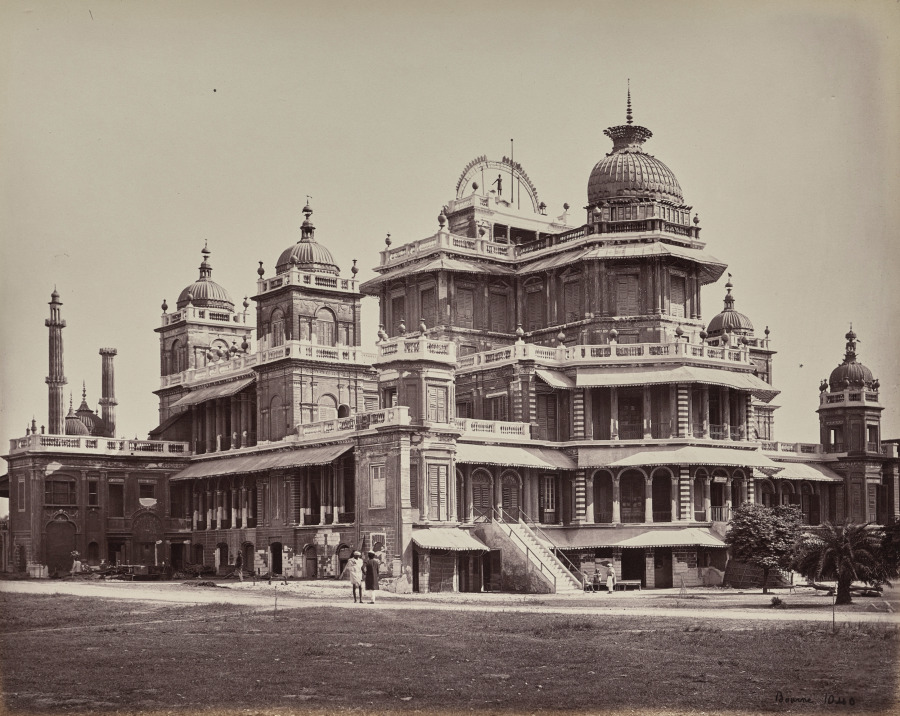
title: Lucknow. The Kaiser Pass and Southeast View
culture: England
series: Photographs of Northern India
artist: Samuel Bourne (British, 1834–1912)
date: 1863–70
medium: albumen print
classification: Photograph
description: The 50 images in this album, all taken in the 1860s, move from the hill towns of the Himalayas down to cities including Lahore (now in Pakistan), Delhi, Lucknow, Agra, Benares (now Varansi), and Calcutta (now Kolkata). Architectural studies of major monuments offer valuable historical records of what sites such as the Taj Mahal and the imperial mosque of the Mughal emperors in Delhi looked like before twentieth-century restorations.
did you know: Samuel Bourne, the author of most the images in this album, was a banker in England before he moved to India to become a professional photographer.